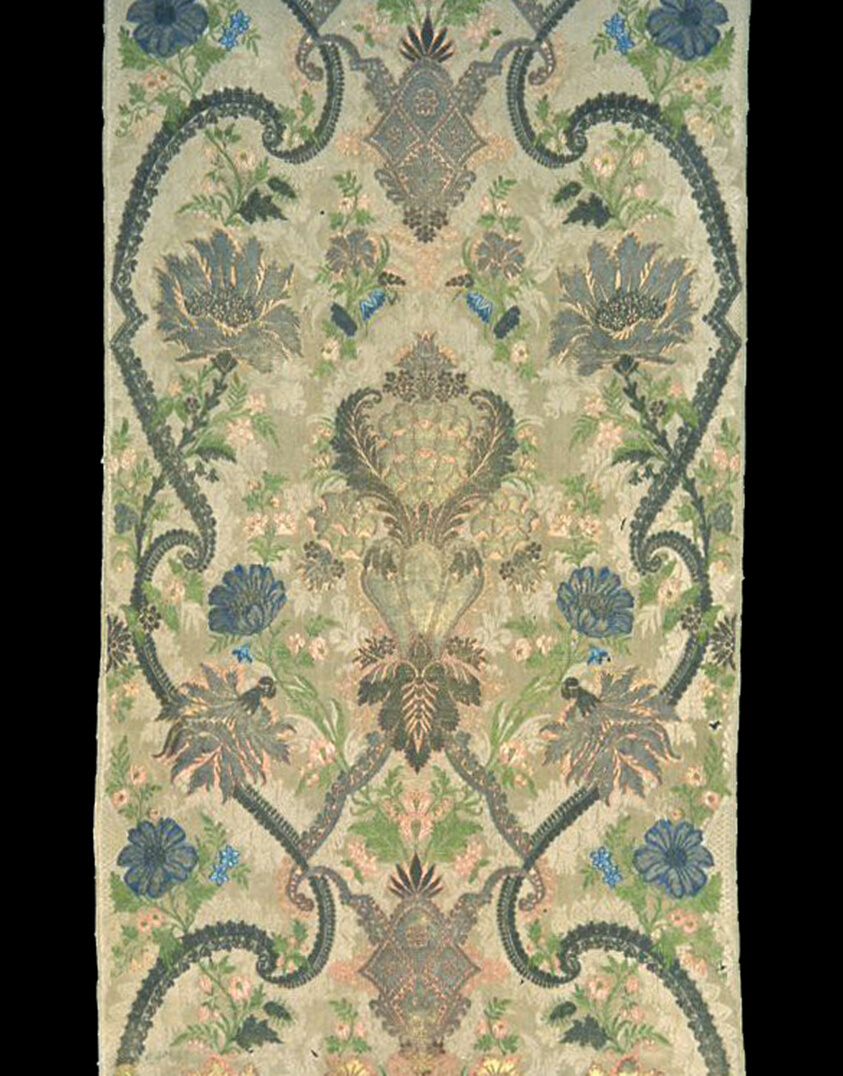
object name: Textile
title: Panel (formerly a Curtain from a Sedan Chair)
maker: France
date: c. 1720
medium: Silk, gold and silver gilt strips wound around silk fiber core, warp-float faced 7:1 satin weave with supplementary brocading wefts tied by supplementary binding warps in 3:1 twill interlacing and self-patterned by areas of plain weave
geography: France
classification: textile; weaving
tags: lace pattern